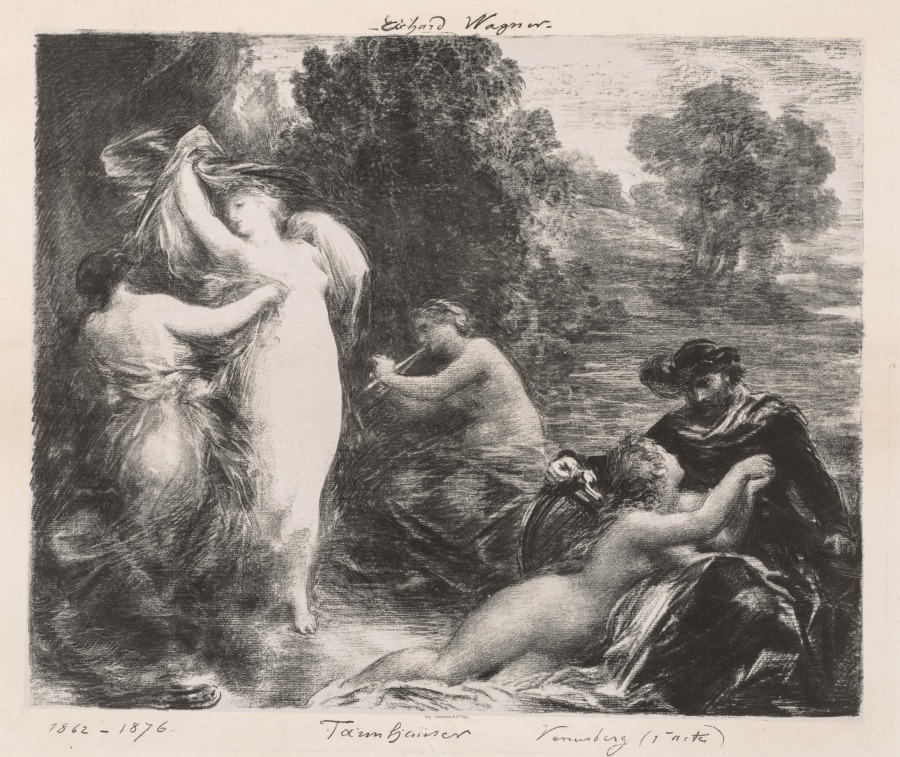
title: Venusberg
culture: France, 19th century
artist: Henri Fantin-Latour (French, 1836–1904)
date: 1876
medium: lithograph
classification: Print